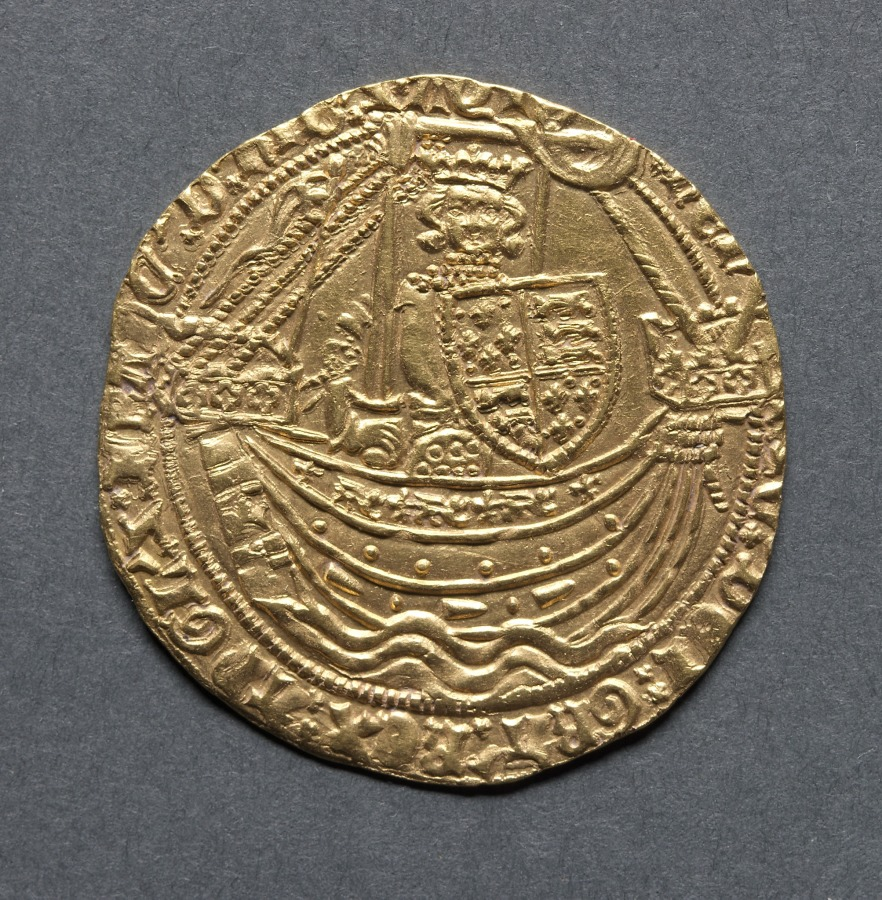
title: Noble: Henry IV Standing in Ship with Shield of Arms (obverse); Ornamental Cross with Lis Terminals (reverse)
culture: England, Henry IV, 1399-1413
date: 1399–1412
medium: gold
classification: Coins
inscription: HENRIC DI GRA REX ANGL S FRANC DNS HIB Z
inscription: IhC AVTEM TRANSIENS PER MEDIV ILLORVM IBAT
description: This is an exceedingly rare coin, only five pieces are known. Of them three are in the British Museum, one with the American Numismatic Society, and one in the Norweb collection, this specimen. Classified as part of the "heavy coinage series," refers both to its great rarity and to the economic state of England at this period. With the ascension of Henry IV, the first king of the House of Lancaster, an economic crisis caused the export of English coins and the import of base foreign currencies. With the English coinage undervalued with relation to foreign coinages the drain on bullion was so great that the supply failed. The result was that until the end of 1403 few coins were struck. At Easter, 1412, steps were taken to reduce the metal content/value of both gold and silver coins. This was done by reducing the weight of metal but issuing the coins at the same face value. Thus the Nobles of the light coinage series which follow that above weighed only 6.9983 gms. This corrected the situation somewhat. Gold coins remained scare, but by the end of the reign silver was plentiful. In modern times, when most current coins of the world have no intrinsic value above a few cents, the same maneuver is carried out by altering the exchange rate between the various currencies concerned.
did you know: The heavier weight gold Noble was the earlier issue of the reign of Henry IV and weighed more than those produced after 1413.